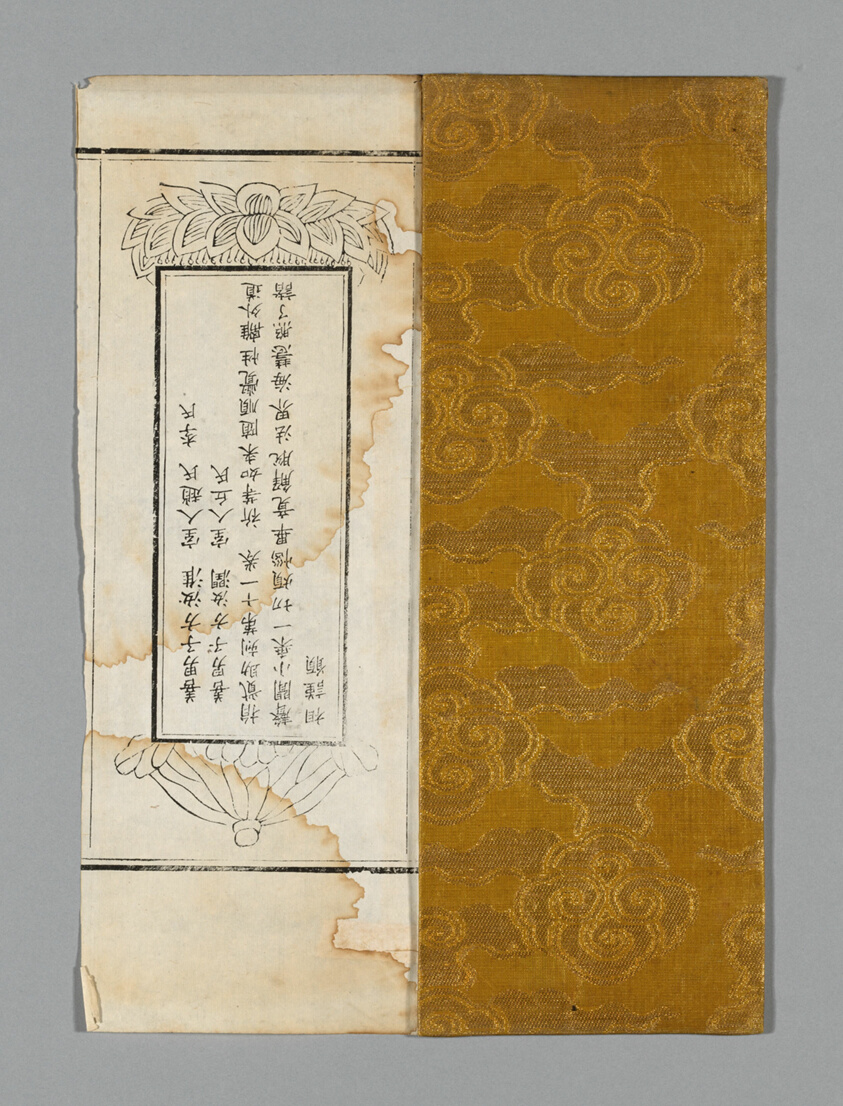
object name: Textile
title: Sutra Cover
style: ming, Chinese (culture or style), East Asian, asian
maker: China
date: Ming dynasty (1368–1644), c. 1590's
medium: Silk and gold-leaf-over-lacquered-paper strips, plain weave with brocading wefts; wrapped over cardboard and backed with paper; sutra, accordion-mounted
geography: China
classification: textile; weaving